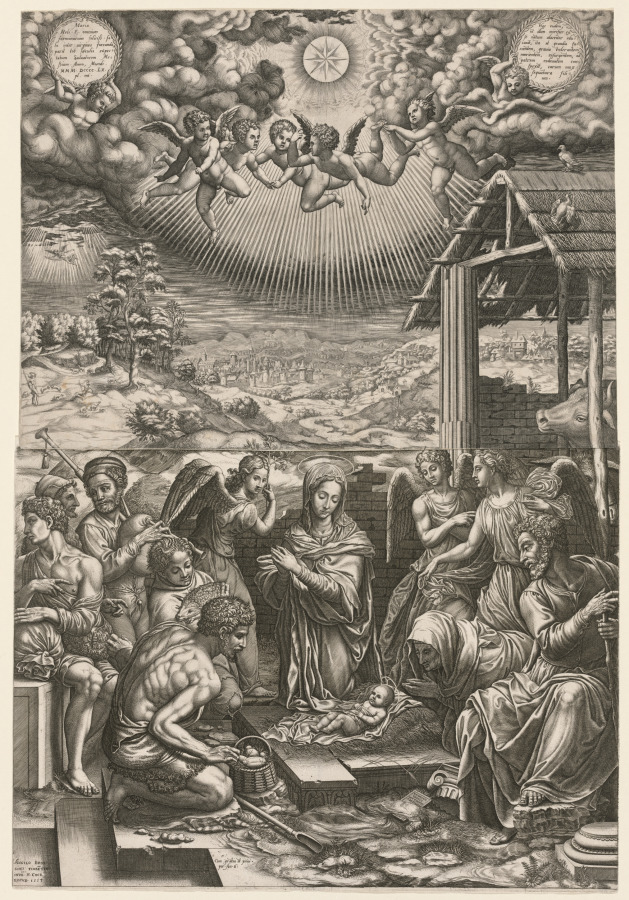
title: The Nativity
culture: Italy, 16th century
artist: Giorgio Ghisi (Italian, 1520–1582)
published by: Hieronymus Cock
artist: after Agnolo Bronzino (Italian, 1503–1572)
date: 1553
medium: engraving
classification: Print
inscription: upper left, in plate: Maria / Heli .F. ominum / foeminarum feliciß . so= / la inter virgines foecunda, / parit tot sæculis expec= / tatum Saluatorem Me= / ßiam. Anno, Mundi. / MMM.DCCC.LX. / pl. mi. ; upper right, in plate: Hec eadem, / ut illum mirifice ex / se natum alacriter edu= / cauit, ita et grandia fa= / cientem, gravia tolerantem, / morientum, resurgentem, ad /patrem redeuntem con= / spexit, carum mox / sequutura fili= / um. ; lower left, in plate: ANGILO BRON= / SINI FIORETINO[line over 'E'] / INVE[line over 'E'].H.COCK / EXCVD.1554 ; lower center, in plate: Cum gratia et privi. / per. An.6. ; lower right, in plate: GEORGIVS / GHISIVS / MNTVANVS / .F.M.D.LIII. ; VERSO, top sheet, lower right, in graphite: DO ; bottom sheet, lower left, in graphite: io ; lower left, in red chalk: 3 II/II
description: The inscriptions praise Mary, the mother of Jesus Christ, emphasizing the great joys and inevitable sorrows that she is to endure in witnessing her son's life and death. After spending about five years in Rome, Ghisi left Italy around 1550 for Antwerp, the major commercial center in the Netherlands. There he worked with Hieronymus Cock (about 1510–1570), founder of the largest and best-known print publishing establishment in northern Europe, called The Four Winds. This print reproduces a painting of similar size by the artist Agnolo Bronzino (1513–1572), painted in the late 1530s for Filippo d'Averardo Salviati of Florence. Making a print based on a work belonging to a private individual was an unusual practice during the 16th century.